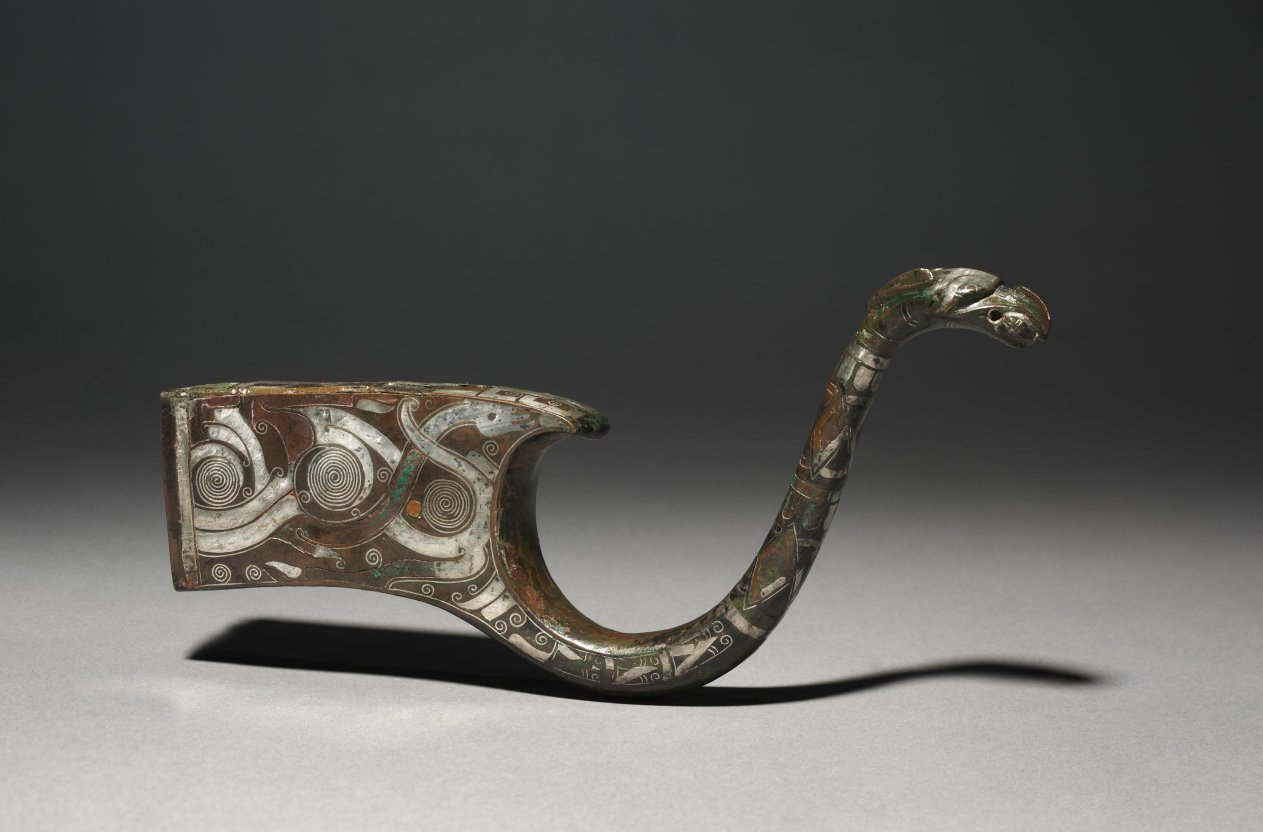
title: Crossbow Support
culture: China, Warring States period (475–221 BCE)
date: 300–200 BCE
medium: bronze inlaid with silver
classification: Metalwork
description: Here, the rectangular socket of the bow support tapers elegantly to form the slender neck of an animal head. Silver inlay of wires and ribbons form an extraordinarily beautiful abstract design consisting of sweeping lines, coils, spirals, and serpentine interlaces.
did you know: Both the support for the crossbow and the inlaid silver pattern on the square socket resemble a bird's long neck and head.